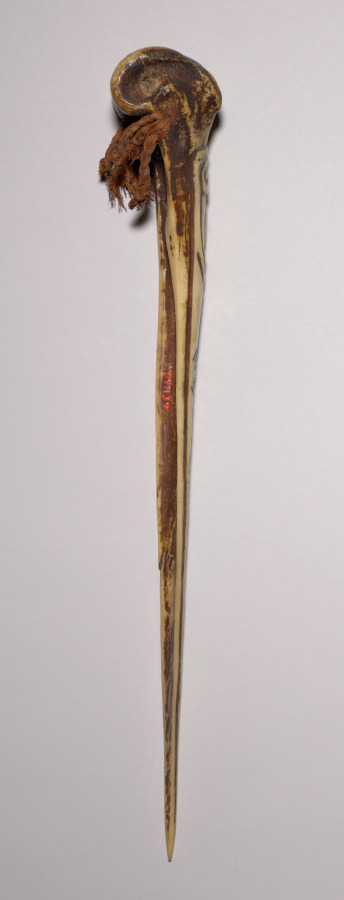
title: Dagger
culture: Melanesia, Papua New Guinea, Sepik River region, 19th century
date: c. 1880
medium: cassowary bone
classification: Sculpture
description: This dagger is decorated with an incised human face and a geometric pattern.